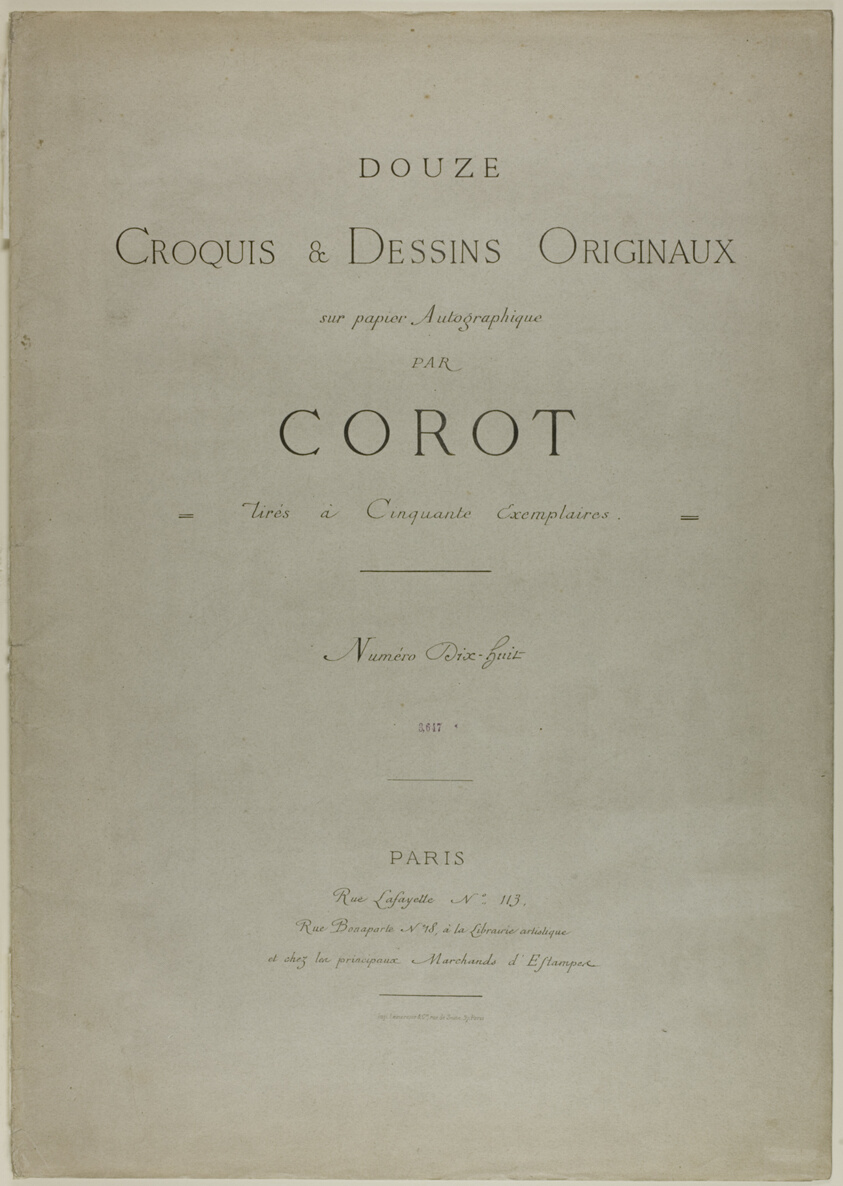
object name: Print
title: Cover and Text for Album Douze Croquis et Dessins Originaux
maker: Jean-Baptiste-Camille Corot (French, 1796-1875); printed by Lemercier et Companie (French, 1825-1891)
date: 1871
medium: Outer cover with title (gray wove) with inner liner bearing title, signature and text (white wove)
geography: France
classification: lithograph; print; prints and drawing